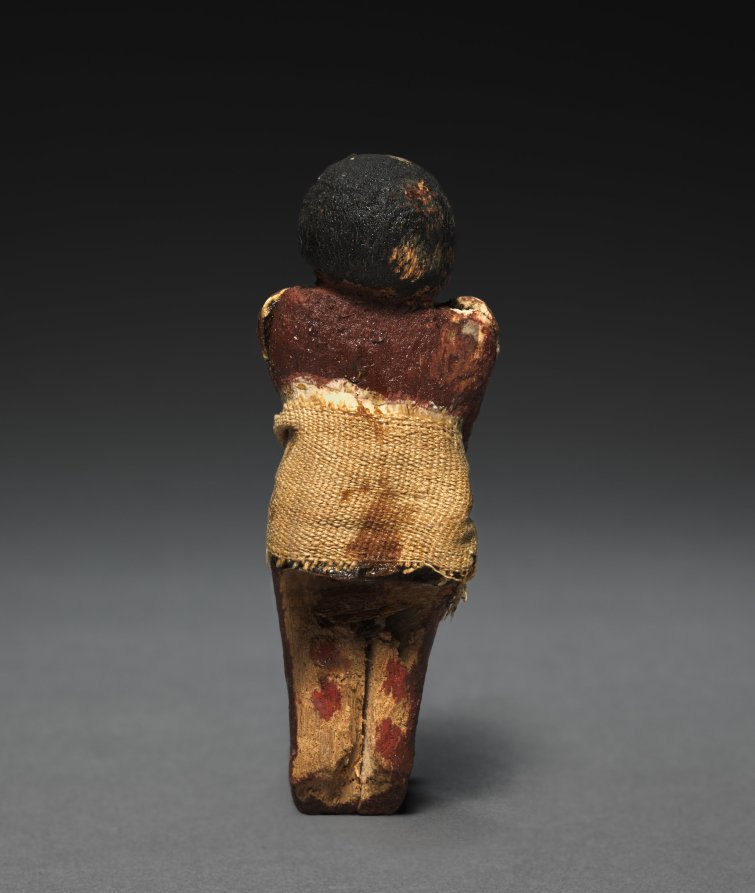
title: Seated Model Sailor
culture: Egypt, Middle Kingdom (2040–1648 BCE), Dynasties 11–12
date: c. 2000–1000 BCE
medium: painted sycamore fig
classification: Funerary Equipment